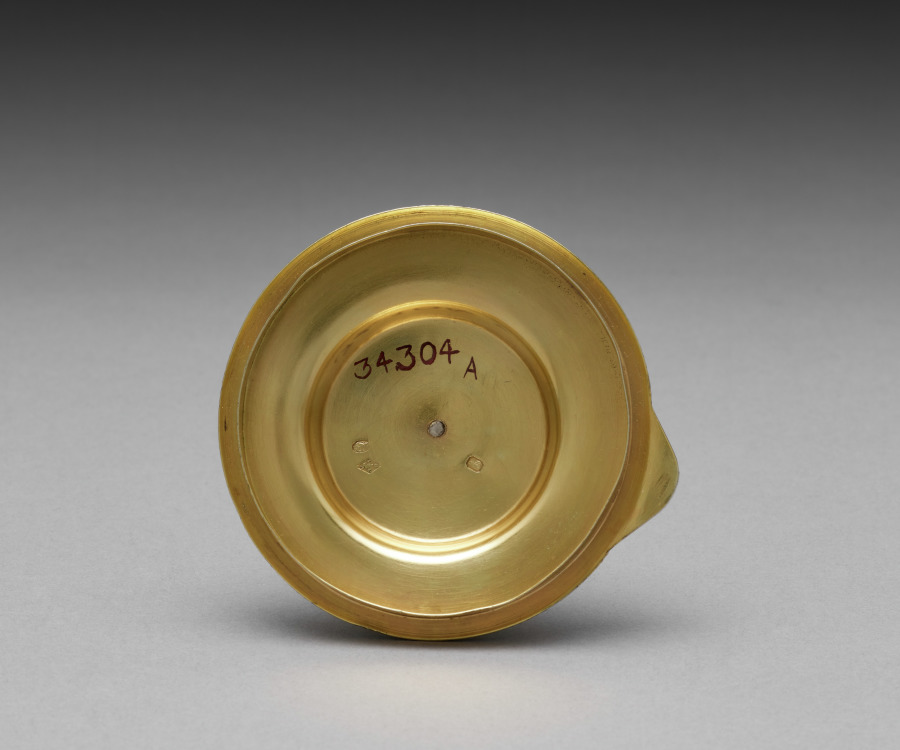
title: Cover for a Chocolate Pot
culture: France, 19th century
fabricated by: Sixte-Simon Rion (French)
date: c. 1830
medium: silver, wooden handle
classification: Silver